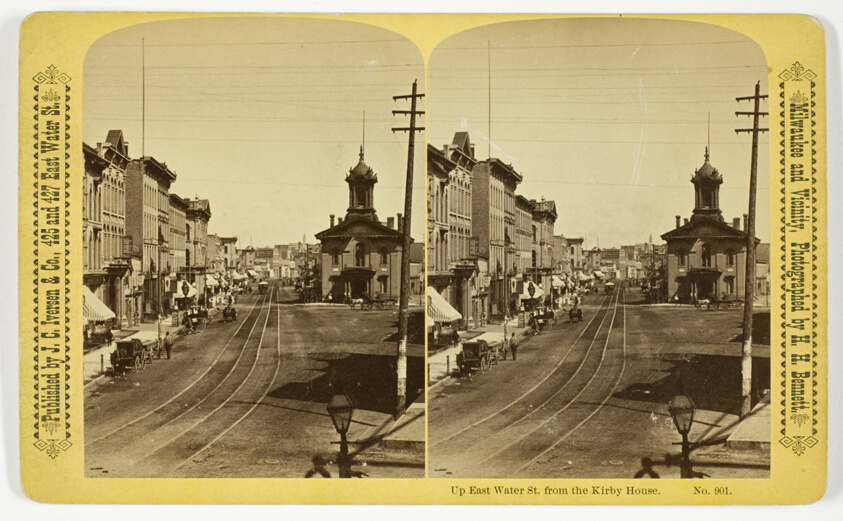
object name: Photograph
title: Up East Water St. from the Kirby House, No. 901 from the series "Milwaukee and Vicinity"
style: 19th century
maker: Henry Hamilton Bennett (American, born Canada, 1843-1908)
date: 1880/89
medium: Albumen print, stereo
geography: United States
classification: photography; photograph; albumen silver print; stereograph (albumen)